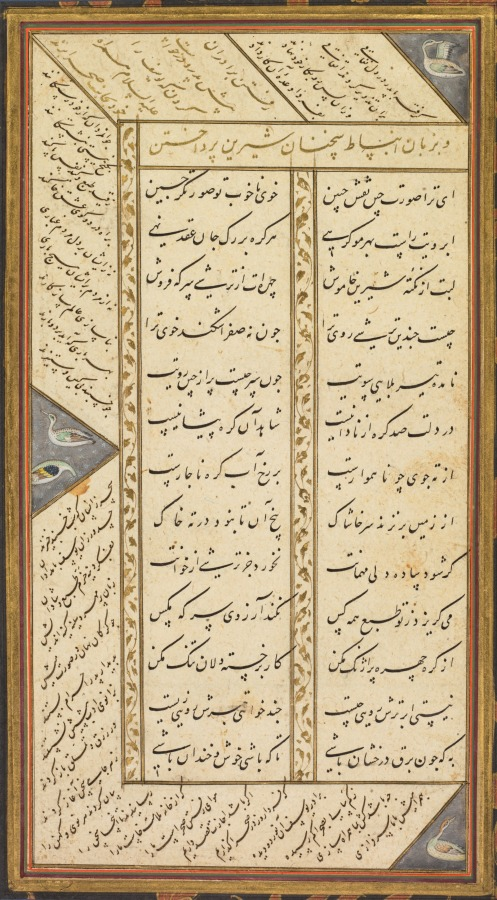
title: Page from the Panj Ganj (Five Treasures) of Abd al-Rahman Jami (Persian, 1414–1492), with two Persian masnavis (narrative poems): Yusuf va Zulaykha (Joseph and Zulaykha) and Subhat al-abrar (Rosary of the Righteous)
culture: Northern India, Mughal, early 17th century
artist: Mushfiq (Indian, active early 1600s)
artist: and others (Indian)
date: Text c. 1500–1520; painting, borders, and illuminations added 1603–7 Text copied by Sultan-Ali Mashhadi (Persian, active early 1500s) for Badi al-Zaman Mirza, ruler of Herat Painted insets and borders by Mushfiq (Indian, active 1580s–early 1600s) Text copied in Herat Painting, borders, and illuminations made in the Deccan for Mughal minister Abd al-Rahim the Khan Khanan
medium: Gum tempera, ink, and gold on paper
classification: Painting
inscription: The miniature signed at upper left: ' amal - i Mushfiq sana 1015 (the work of the Mushfiq year 1015) Text on verso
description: The recto of this album page contains two different texts, one written diagonally in the border and the other in the two central columns. The section of poetry in the border describes an episode from Joseph’s childhood in which his older brothers suggest to Jacob, their father, that they take Joseph into the countryside so that the boy can learn the area, although they actually plan to kill him. The poem in the central columns advises the reader to smile often, as a smile is sweeter and more pleasing than sugar. This page is from a prized manuscript owned by one of the most respected statesmen of the imperial Mughal court, Abd al-Rahim. He served as the Khan Khanan, or vizier, the trusted minister under both Akbar and Jahangir. Abd al-Rahim was an avid book collector and patron of the arts. He acquired this book of five extended narrative poems, which included the story told in rhyme of the romance between Joseph and the Egyptian lady Zulaykha, about 80 years after its completion. The book’s illumination had not been finished, so Abd al-Rahim commissioned the exuberant decor of the borders and insets along with full-page paintings that illustrate key scenes in the text.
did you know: The bearded goat in a rocky landscape evokes what Joseph might see on his outing.